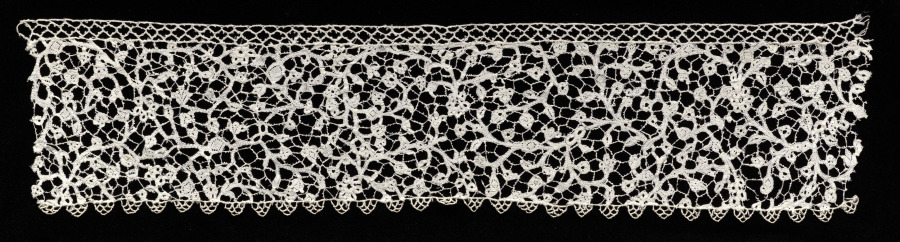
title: Lace Border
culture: Italy, Milan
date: 1600s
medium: Linen: bobbin lace (bride ground)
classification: Lace